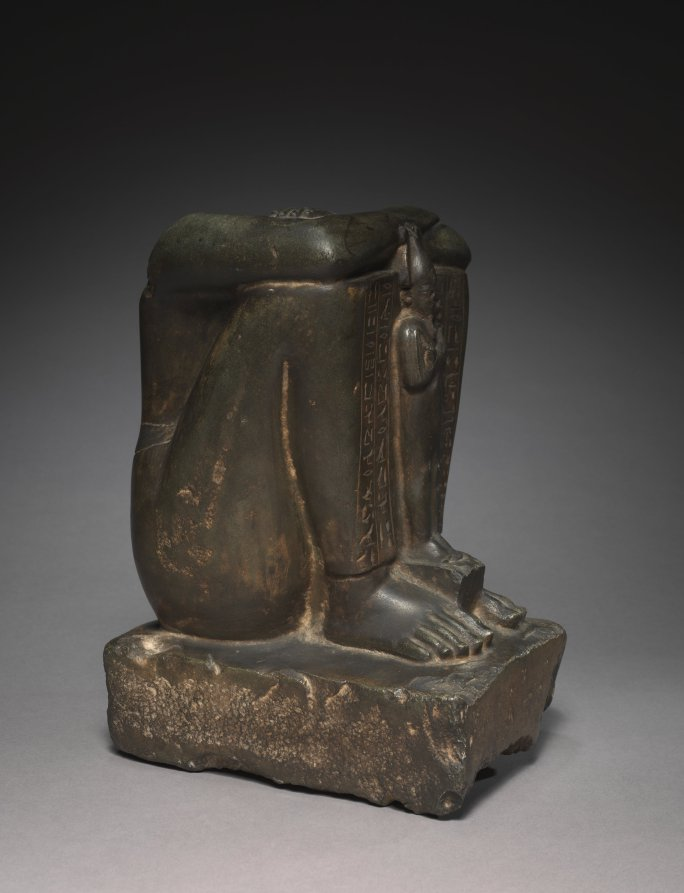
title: Block Statue of the Royal Acquaintance, Horwedja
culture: Egypt, Late period (715–332 BCE), Dynasty 26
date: 664–525 BCE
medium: graywacke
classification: Sculpture